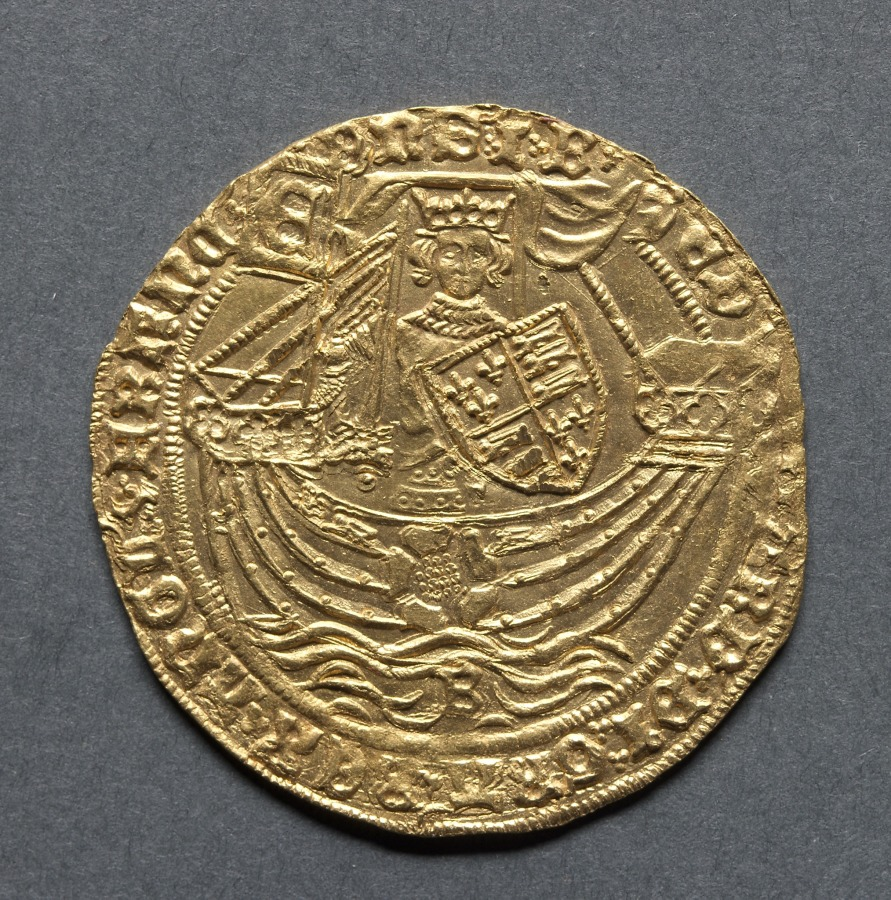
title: Ryal: Edward IV in Ship with a Shield of Arms and Rose (obverse); Sun with Fleurs (reverse)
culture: England, Edward IV (first reign 1461-1470, second reign 1471-1483)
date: 1464/5–70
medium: gold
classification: Coins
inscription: ЄD · · WΛRD’ · DI · GRΛ’ · RЄX · ΛNGL’ · Z · FRΛn · · C DNS’ · I · B’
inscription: IhC’ · ΛVT’ · TRΛnSIЄnS · PER · mЄDIVm · ILLORVm : I · BΛT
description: The first and second reigns of Edward IV, who was restored to the throne, were a result of the dynastic civil war between the houses of York and Lancaster, usually known as the Wars of the Roses. The fighting flared up sporadically from 1455 to 1485. With the accession of Edward IV the gold supply was almost nil and after four years the output had been reduced to 300 ibs. Something had to be done without disturbing the country, so a new coin was issued, to be known as the Ryal or Rose Noble. This coin was to have a value of ten shillings. However the gold noble had become the standard professional fee (6s 8d), so a new gold coin known as the angel was issued, with a value of 6 shillings and 8 pence. It became the famous coin that served Tudor and Stuart sovereigns as their presentation piece at the ceremony of touching for the king's evil. The angel pictured St. George slaying the dragon, some say as an allegory of the overthrow of the house of Lancaster by that of York. This is the last of the Noble-type coins. Though the reigns changed over the years, the type of coin varied little in design. During the reign, branch mints were set up in York, Bristol, Coventry, and Norwich.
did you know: Edward IV (1442–1483) was King of England from March 4, 1461, to October 3, 1470, and then again from April 11, 1471, until his death in 1483.